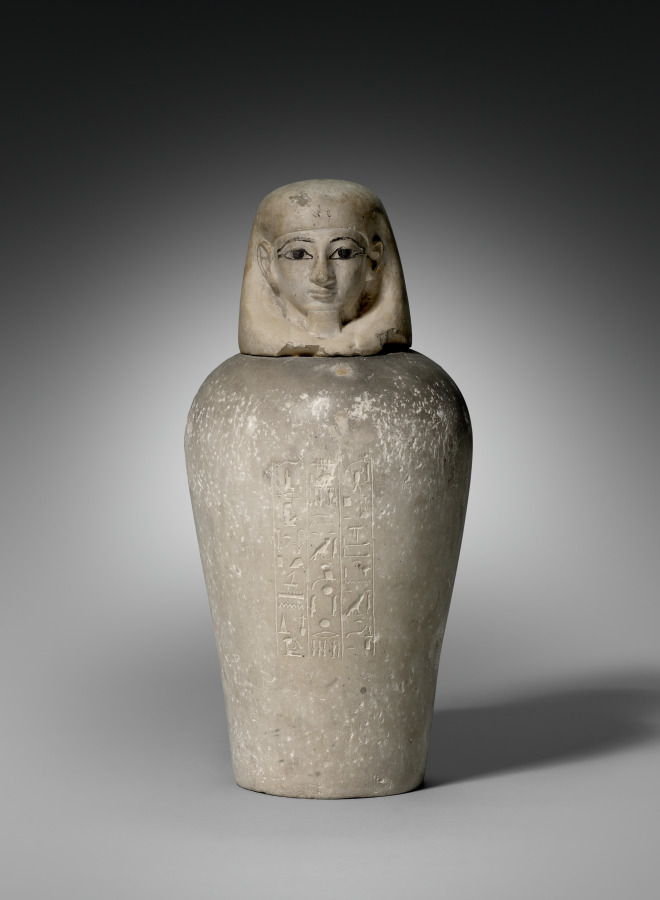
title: Canopic Jar with Lid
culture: Egypt, New Kingdom (1540–1069 BCE), Dynasty 18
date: 1540–1296 BCE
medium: limestone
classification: Funerary Equipment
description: Embellished tulle strips delicately wrap around the length of the Dior gown like linen covering a mummified body. As European artists in the 1800s who journeyed to Egypt drew what they saw, for the Dior collection he designed, John Galliano sketched his experiences in Egypt to develop this theatrical collection, merging additional inspirations of medical bandages and fetish fashion. In ancient Egypt, mummification was the most sacred practice performed. Rituals, such as removing organs and placing them in canopic jars, like the one here, and wrapping bodies and putting them in coffins, helped ensure the deceased’s safe passage into the afterlife.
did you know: Canopic jars are named after the Greek sailor Canopus, who was said to be buried at Canopus (Abuqir) in the western Nile delta and worshipped there in the form of a human-headed jar that was actually a form of Osiris and had nothing to do with internal organs. But the term has stuck.